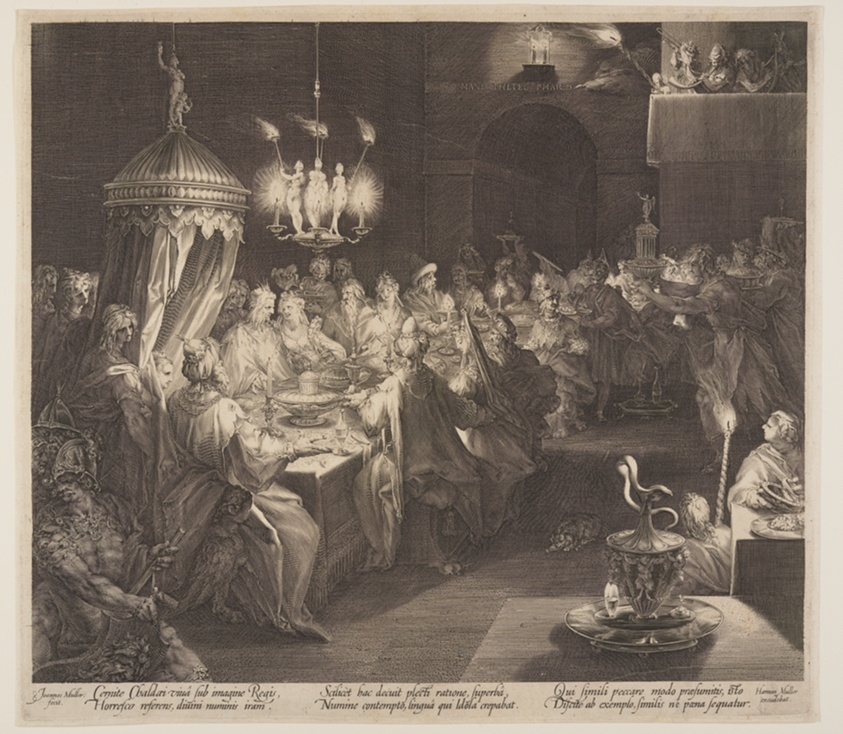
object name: Print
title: Belshazzar’s Feast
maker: Jan Harmensz Muller; Dutch, 1571–1628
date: c. 1598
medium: Engraving on ivory laid paper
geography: Netherlands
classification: engraving; paper; print; prints and drawing